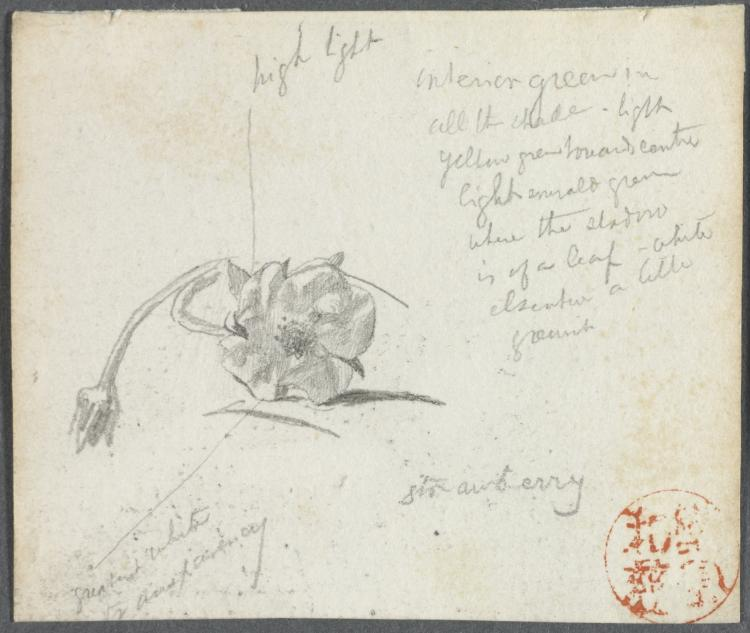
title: Strawberry Blossom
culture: America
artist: John La Farge (American, 1835–1910)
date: c. 1850–1910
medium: pencil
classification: Drawing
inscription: Circular red stamp, surname of La Farge in Japanese characters